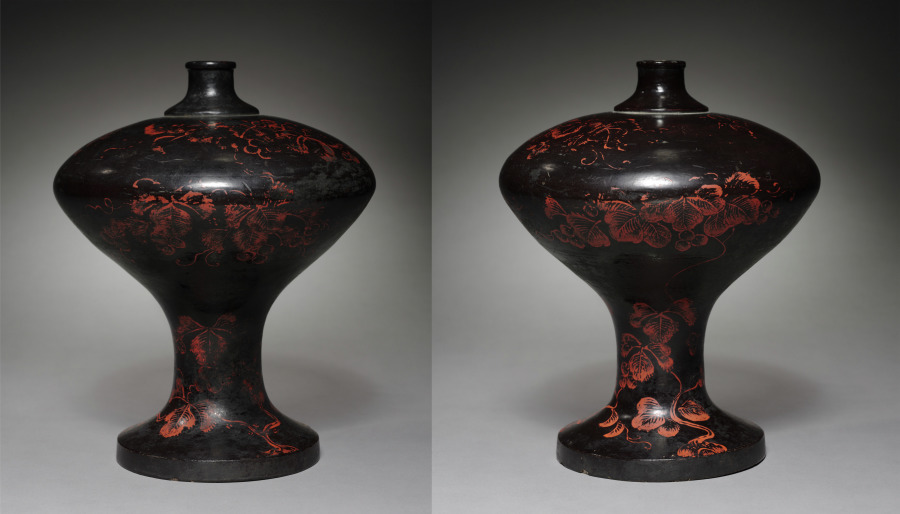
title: Sake Flask (pair)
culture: Japan, Muromachi period (1392–1573)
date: 1500s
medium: Black laquered wood with red lacquer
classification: Lacquer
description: This flask contained rice wine, or sake. Its wood body was shaped by a lathe before black lacquer was applied to the surface. A red lacquer design of grapevines, an auspicious motif, covers the surface. With their numerous, long-lasting fruits, grapevines traditionally symbolized fertility and longevity in East Asia.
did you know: The evocative imagery of brushed leaves and bunches of grapes suggest that the artist referred to a particular painting when decorating this vase.